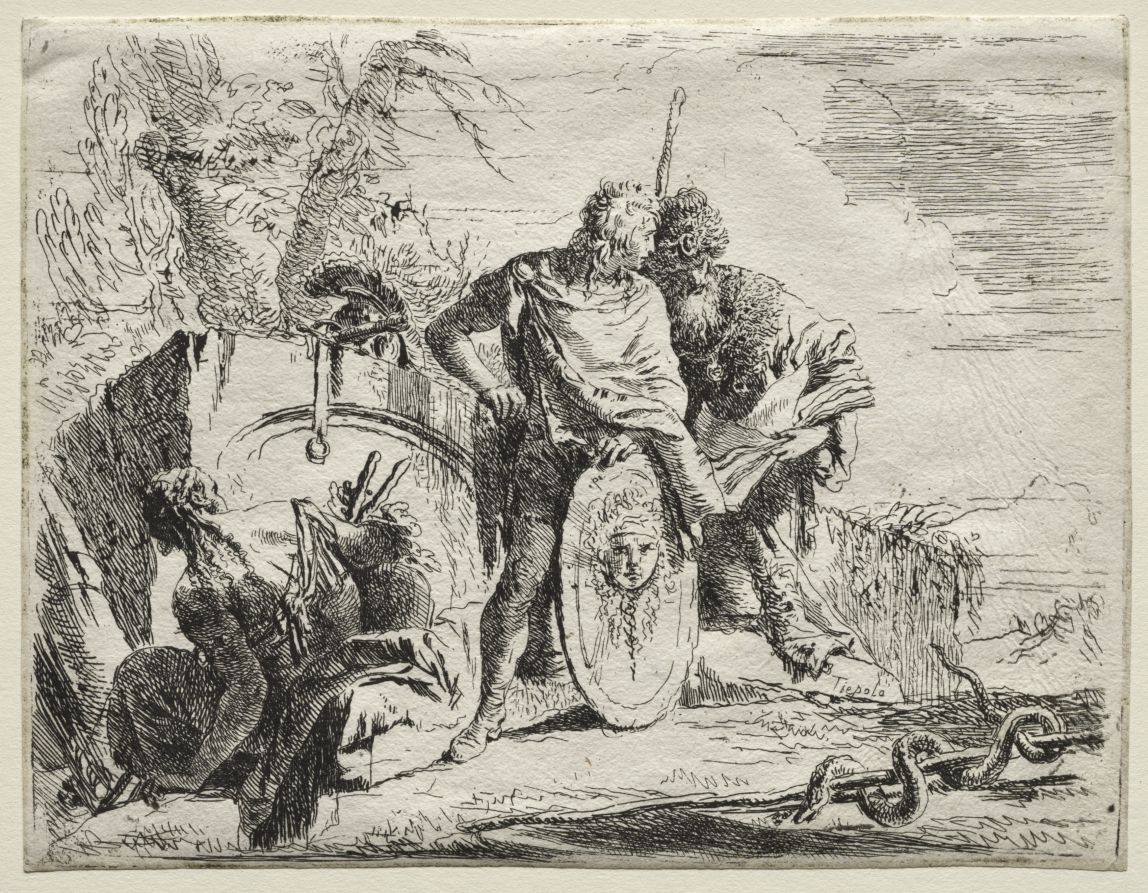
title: Various Caprices: The Astrologen and the Young Soldier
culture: Italy, 18th century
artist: Giovanni Battista Tiepolo (Italian, 1696–1770)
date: 1735–50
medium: etching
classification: Print